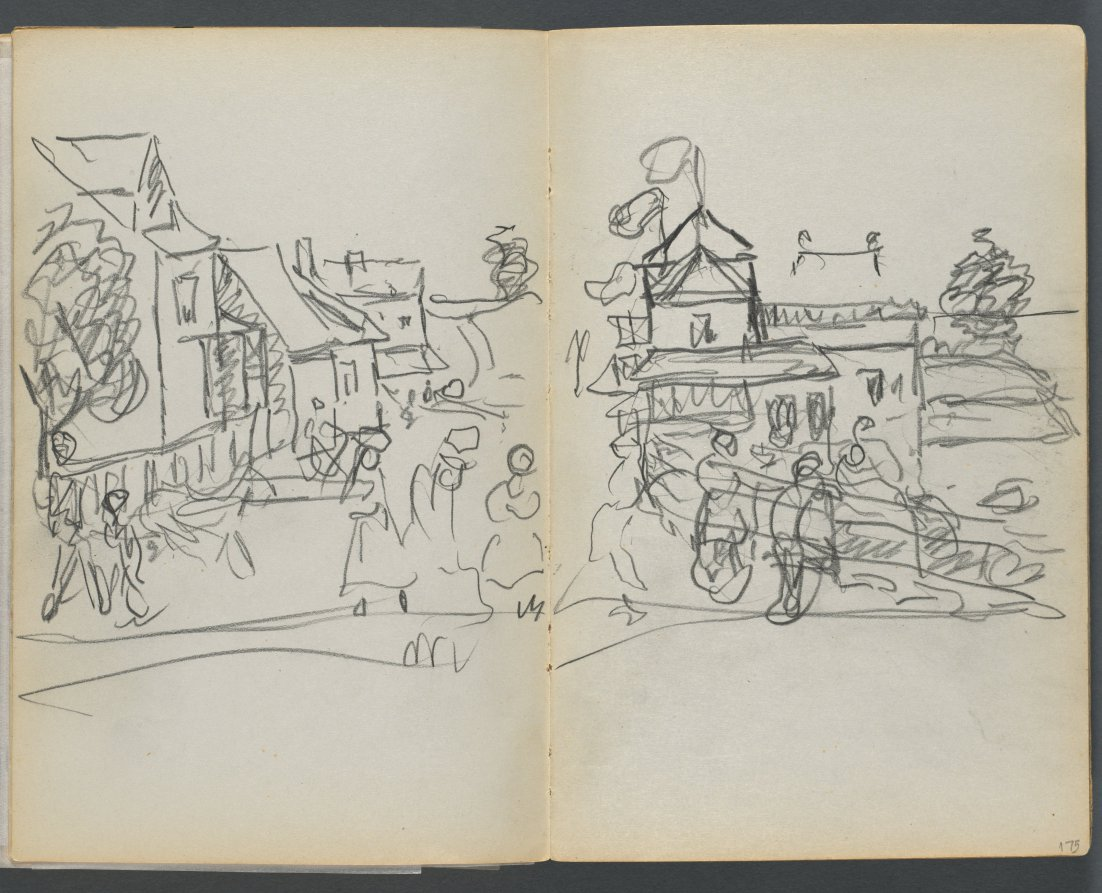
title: Sketchbook, The Dells, N° 127, page 174 & 175: Village with Houses and Road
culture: America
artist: Maurice Prendergast (American, born Newfoundland [now Canada], 1858–1924)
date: c. 1919–1921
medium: graphite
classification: Bound Volume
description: This sketchbook contains 59 pages of graphite drawings and 16 watercolors made at various locations on Cape Ann, Massachusetts.